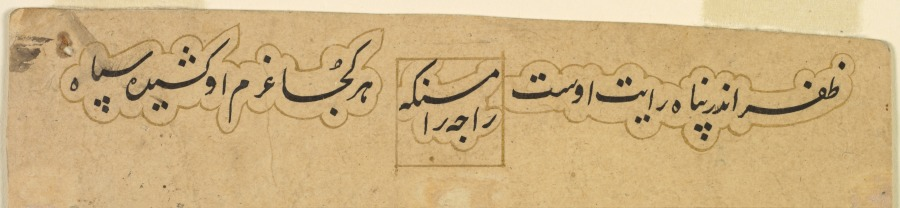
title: Portrait of Raja Ram Singh of Amber (r. 1667-1688) with a Deccan Sword (recto)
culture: India, Mughal, 17th century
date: c. 1680–85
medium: Gum tempera and gold on paper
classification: Painting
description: The sensitive, naturalistic rendering of weariness and forbearance in the face belies the trappings of favor bestowed on Ram Singh by the Mughal emperors Shah Jahan and Alamgir, whom he served as courtier and general between 1643 and 1688. He was a Hindu ruler from the kingdom of Amber in Rajasthan, under the control of the Mughal empire. Spending most of his life at the imperial court or leading military expeditions for the Mughals, this portrait was included in a Mughal album and inscribed with an Urdu verse indicating his value to the empire: "wherever he has led an expedition, victory is his." He wears a sumptuous coat of honor with a fur collar, woven with gold threads and floral sprigs and costly rubies, emeralds, and pearls. The straight sword with enameled hilt may be the one gifted to him by the emperor upon his succession to the throne as king of Amber in 1667. His long history of service at the imperial court, however, was checkered with troubles, including his allegiances with failed successors of Shah Jahan and the escape of the rebel Shivaji under his watch.